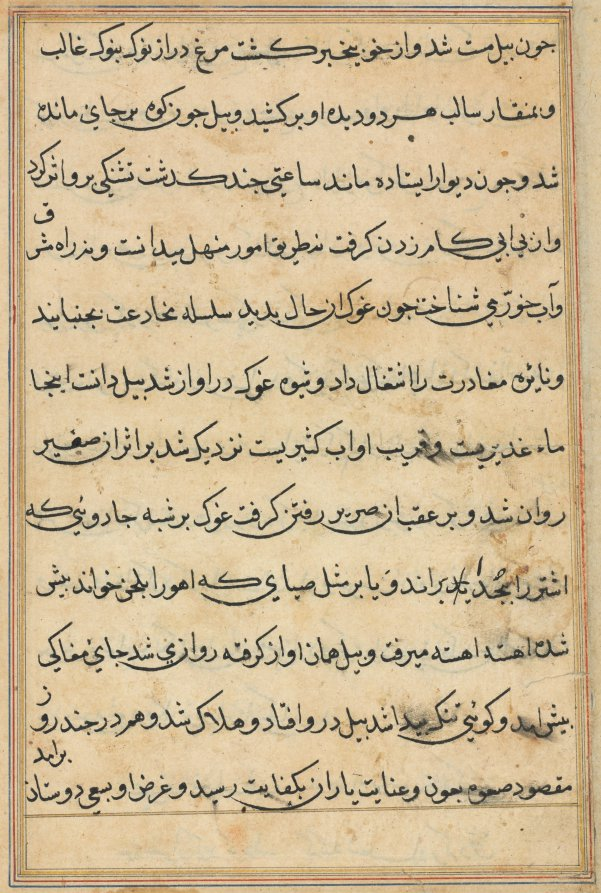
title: Page from Tales of a Parrot (Tuti-nama): text page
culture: Mughal India, court of Akbar (reigned 1556–1605)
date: c. 1560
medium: gum tempera, ink, and gold on paper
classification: Painting